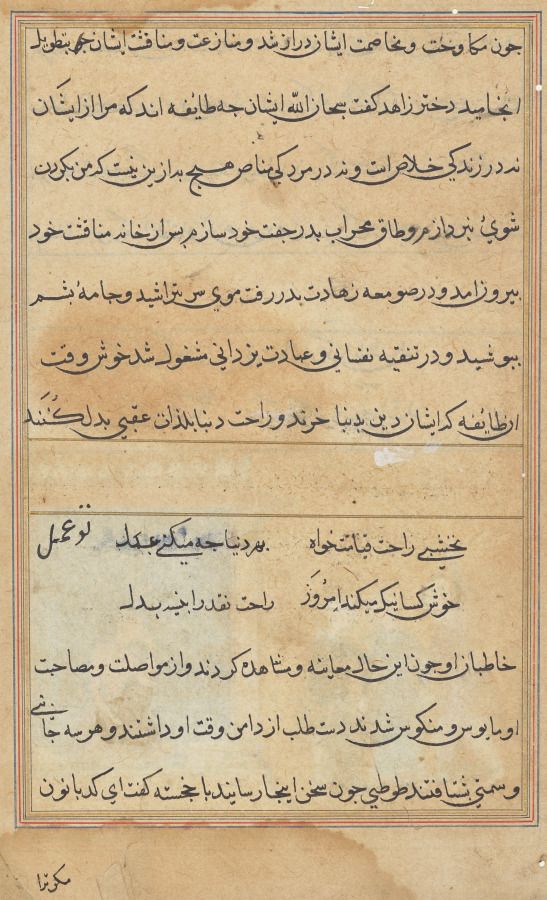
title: Page from Tales of a Parrot (Tuti-nama): text page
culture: Mughal India, court of Akbar (reigned 1556–1605)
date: c. 1560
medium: gum tempera, ink, and gold on paper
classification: Painting